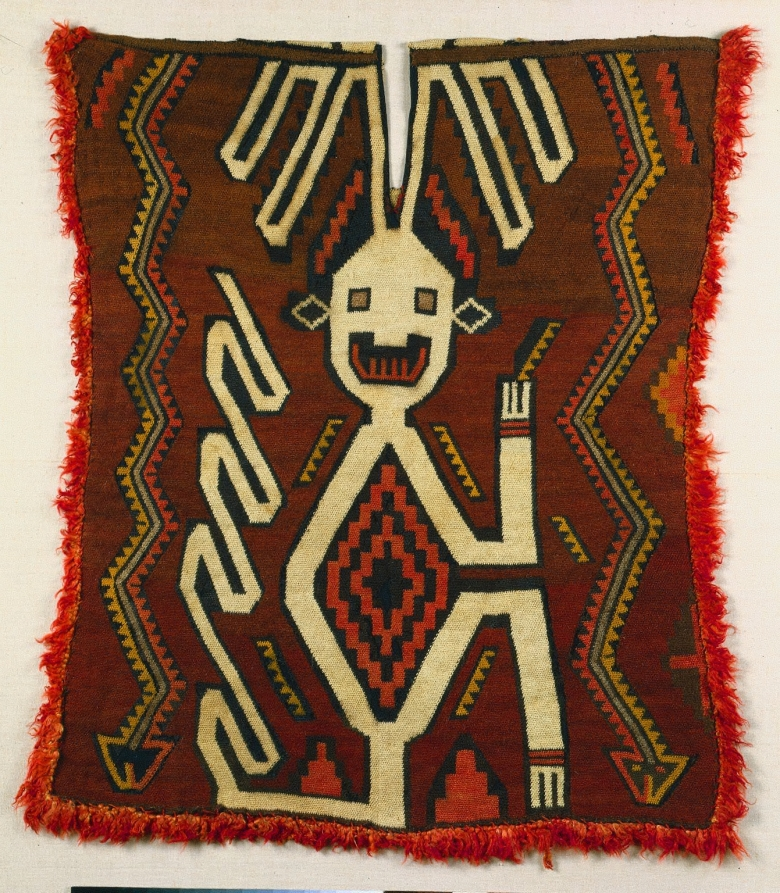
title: Tunic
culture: Peru, South Coast, Ica Valley, Ocucaje site?, Paracas people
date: 400–200 BCE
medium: looped camelid fiber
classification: Textile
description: The striking, large-scale figure shown on this tunic has an elaborate, monkey-like tail as well as head appendages that mark the creature as supernatural. This tunic, a relatively rare type, was made not on a loom but rather by working the yarns into loops with a needle. It is made entirely with camelid fiber, which can readily be dyed in a range of vivid colors. The fiber comes from one of the four camels (camelids) native to the Andes Mountains—the alpaca and llama, both domesticated, and the wild guanaco and vicuña. On the coast, it represents a prestige import.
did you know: The red dyes in this tunic likely come from madder root.